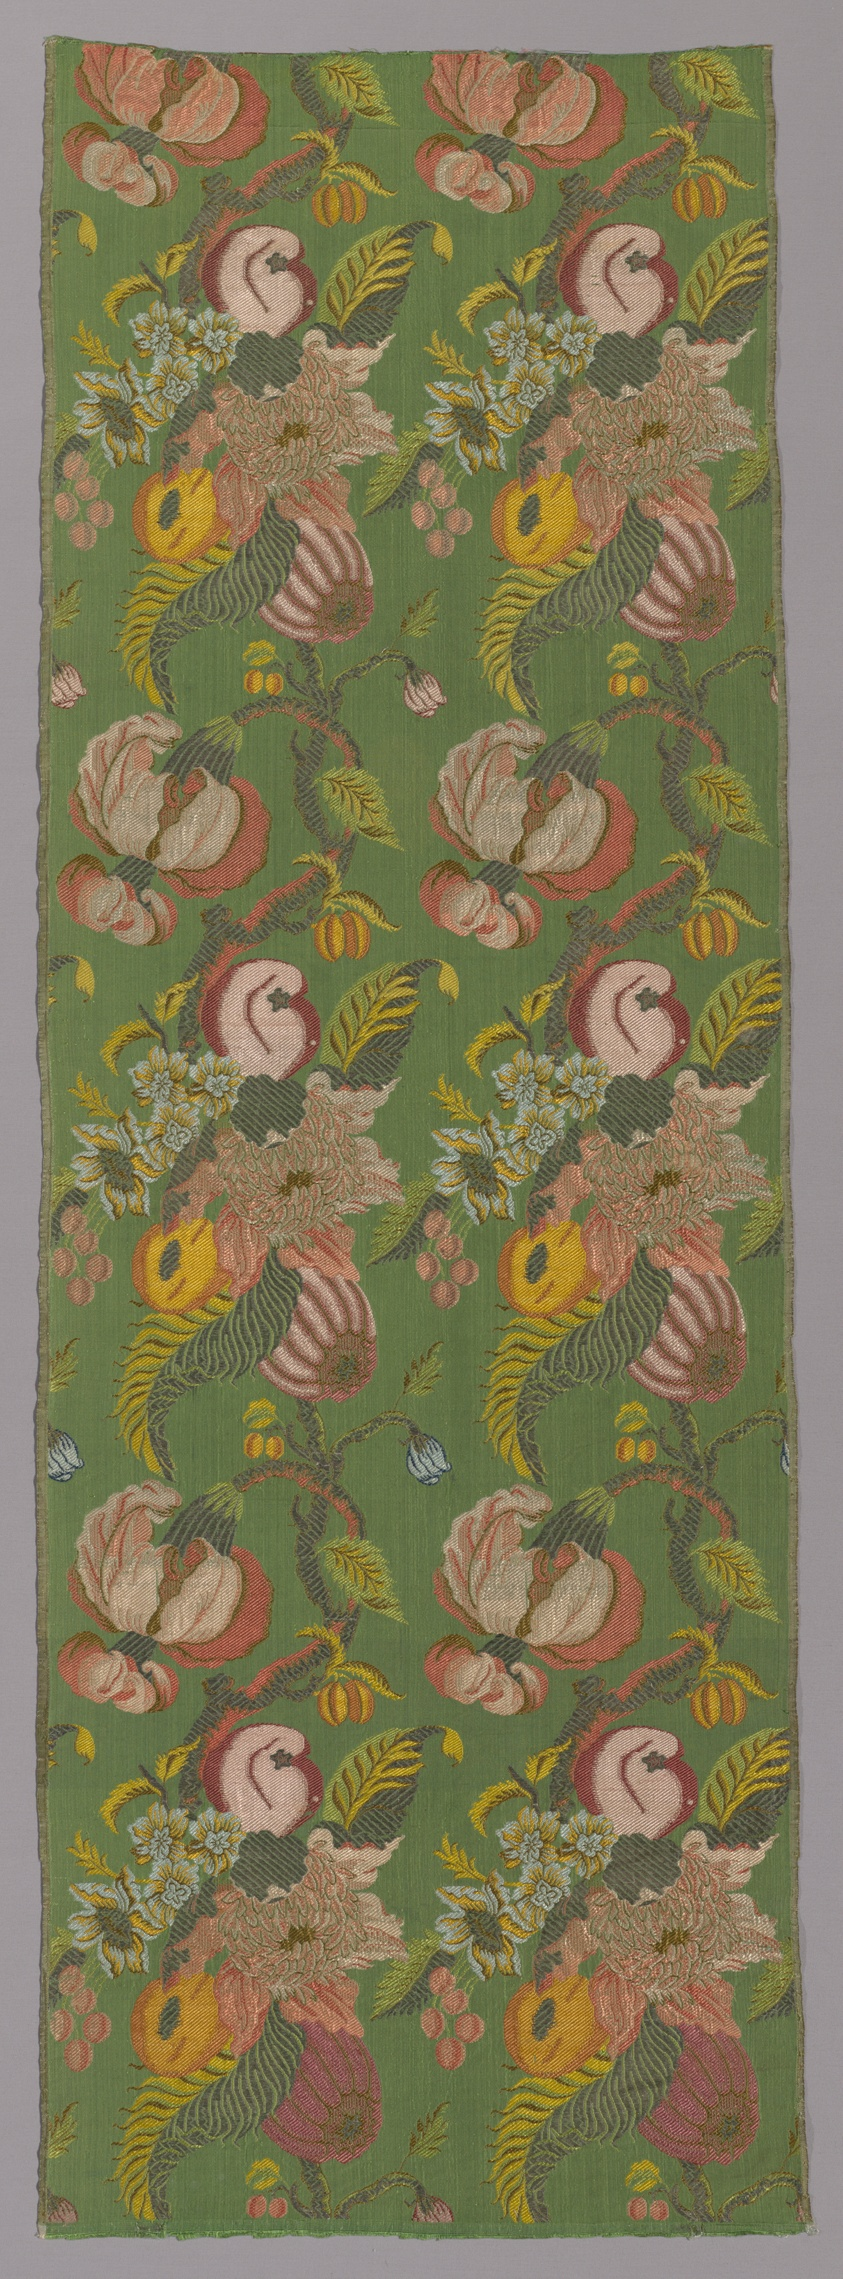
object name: Textile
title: Length of Woven Silk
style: 18th Century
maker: France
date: 1735/38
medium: Silk and gilt-metal-strip-wrapped silk, plain weave with supplementary patterning wefts and some supplementary brocading wefts bound in weft-float faced 3:1 twill interlacings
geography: France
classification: weaving; textile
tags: flowers, botanical/floral, floral, floral motifs, foliage, fruit